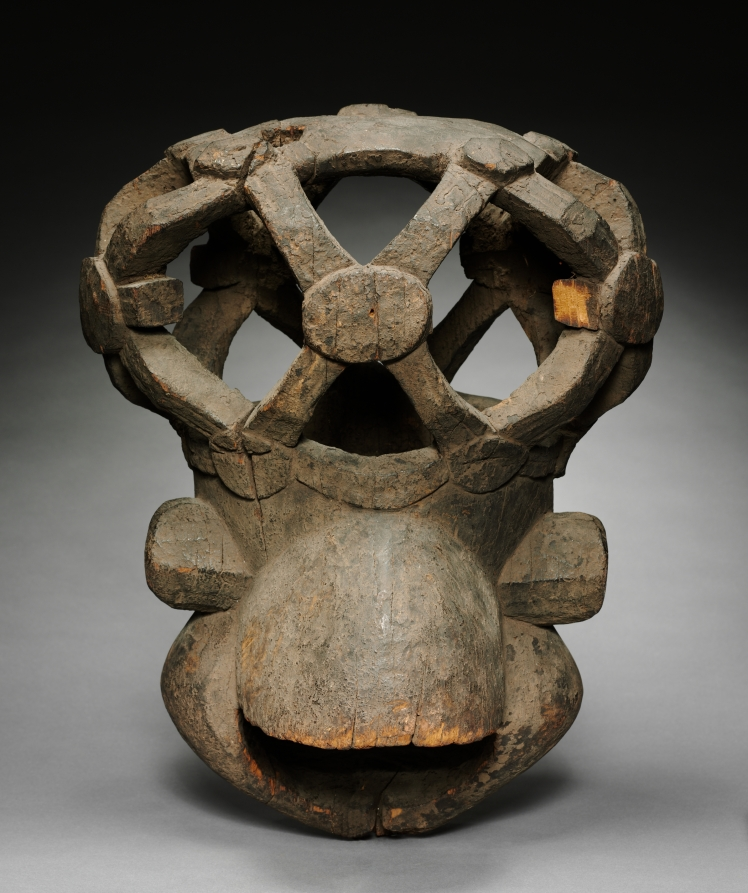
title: Helmet Mask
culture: Africa, Central Africa, Cameroon, Bamum Kingdom, Bamum-style maker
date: c. 1900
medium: Wood, kaolin, and organic materials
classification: Mask